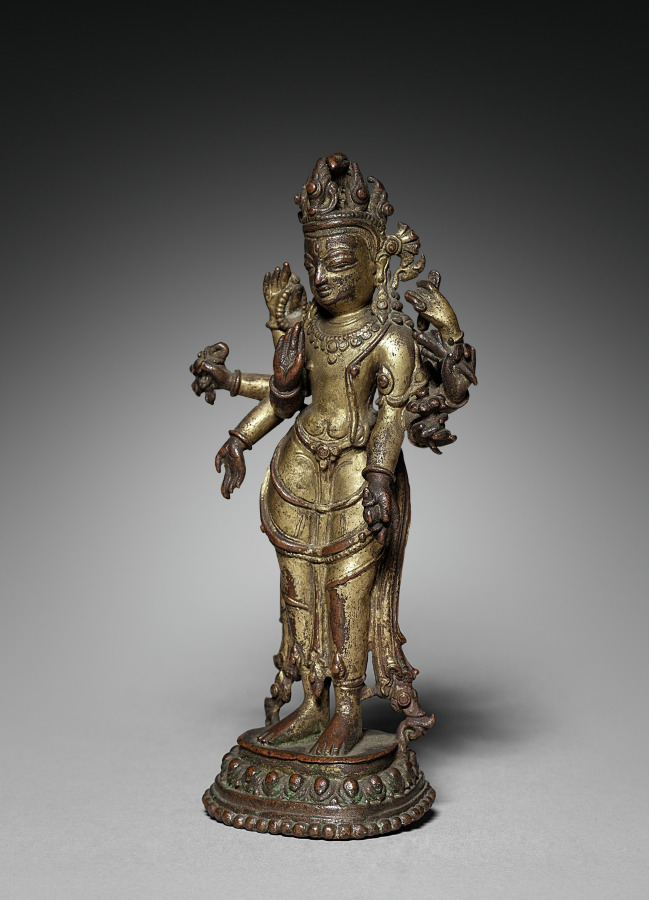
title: Lokesvara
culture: Nepal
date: 1600s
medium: gilded copper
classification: Sculpture